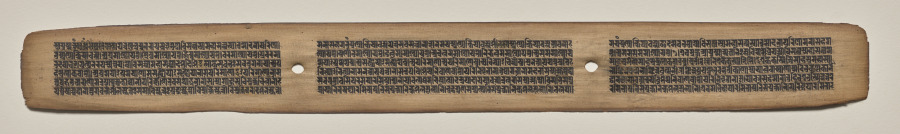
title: Text, folio 48 (recto), from a Manuscript of the Perfection of Wisdom in Eight Thousand Lines (Ashtasahasrika Prajnaparamita-sutra)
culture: Eastern India, Bihar, Vikramashila Monastery. Painting: Nepal, Kathmandu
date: Sunday, September 14, 1119 (year 239 of the Newar Samvat in the month of Ashvina)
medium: gum tempera and ink on palm leaves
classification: Painting